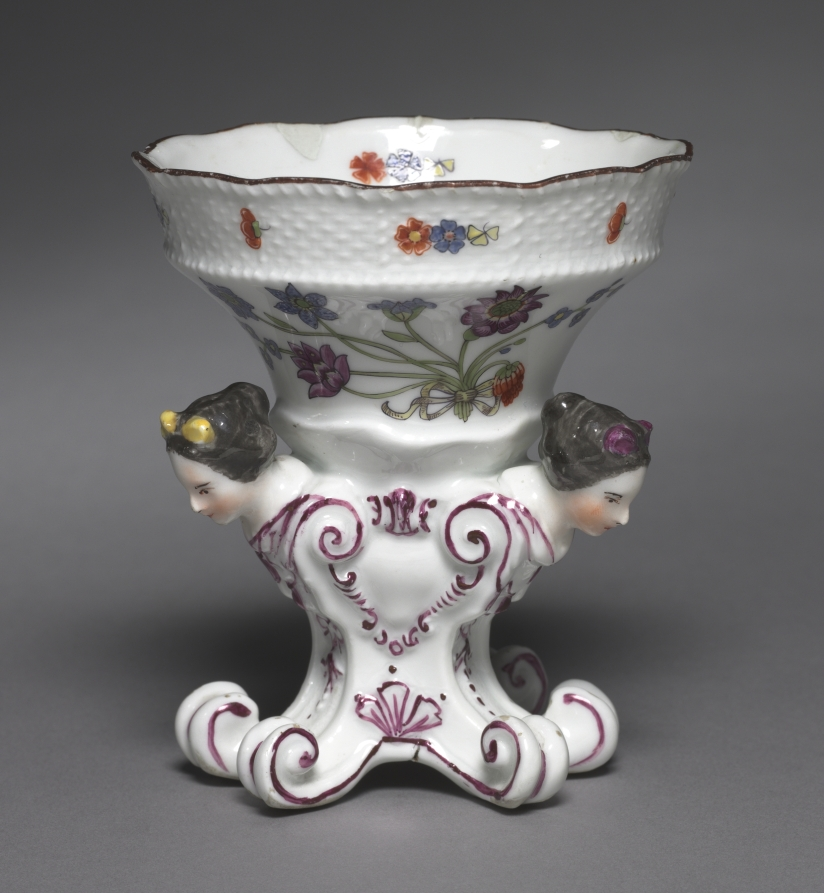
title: Salt Cellar from the Sulkowsky Service (1 of 2)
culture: Germany, Meissen, 18th century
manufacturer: Meissen Porcelain Factory (German, est. c. 1710)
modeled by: Johann Friedrich Eberlein (German, 1696–1749)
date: c. 1736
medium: hard-paste porcelain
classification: Ceramic